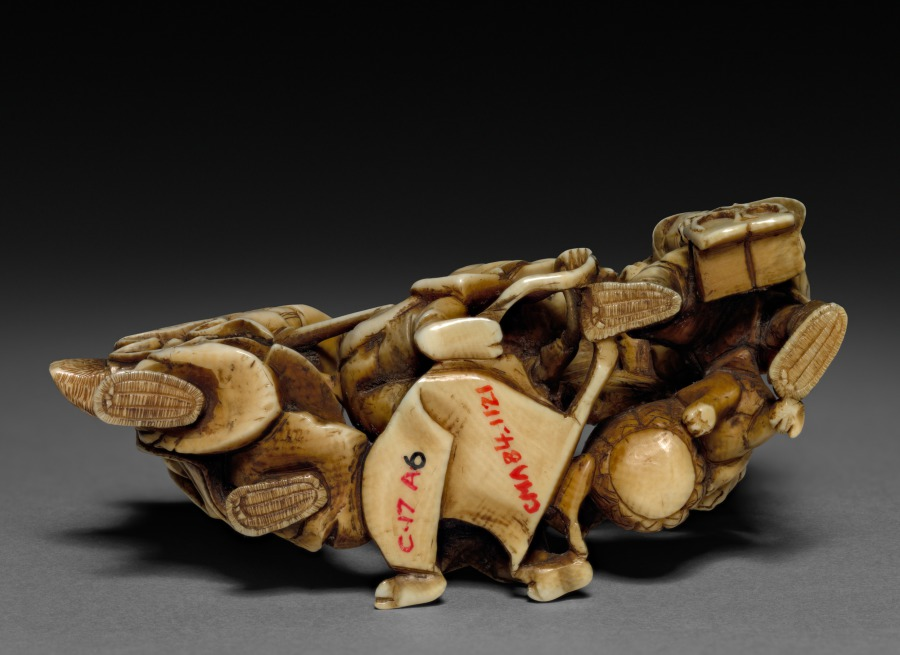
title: Procession with Four Figures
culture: Japan, Meiji period (1868–1912)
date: Late 1800s- Early 1900s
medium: ivory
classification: Ivory